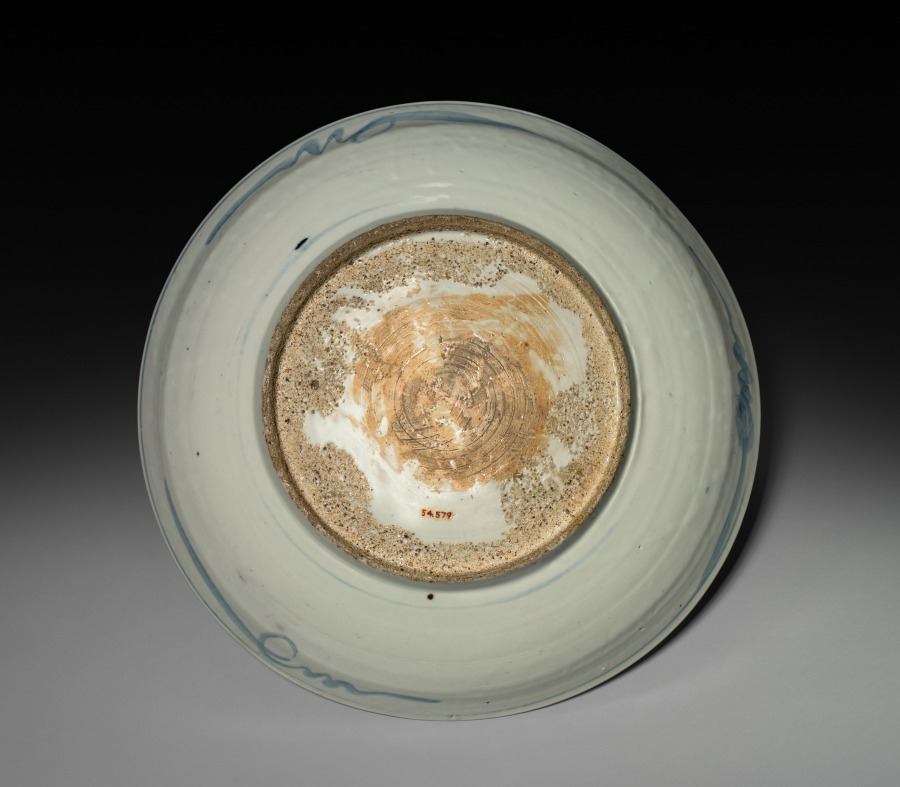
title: Plate with Phoenix and Peonies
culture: China, Southern Fujian province, Ming dynasty (1368-1644)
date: late 1500s–early 1600s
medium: Porcelain with underglaze blue, "Swatow" ware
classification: Ceramic